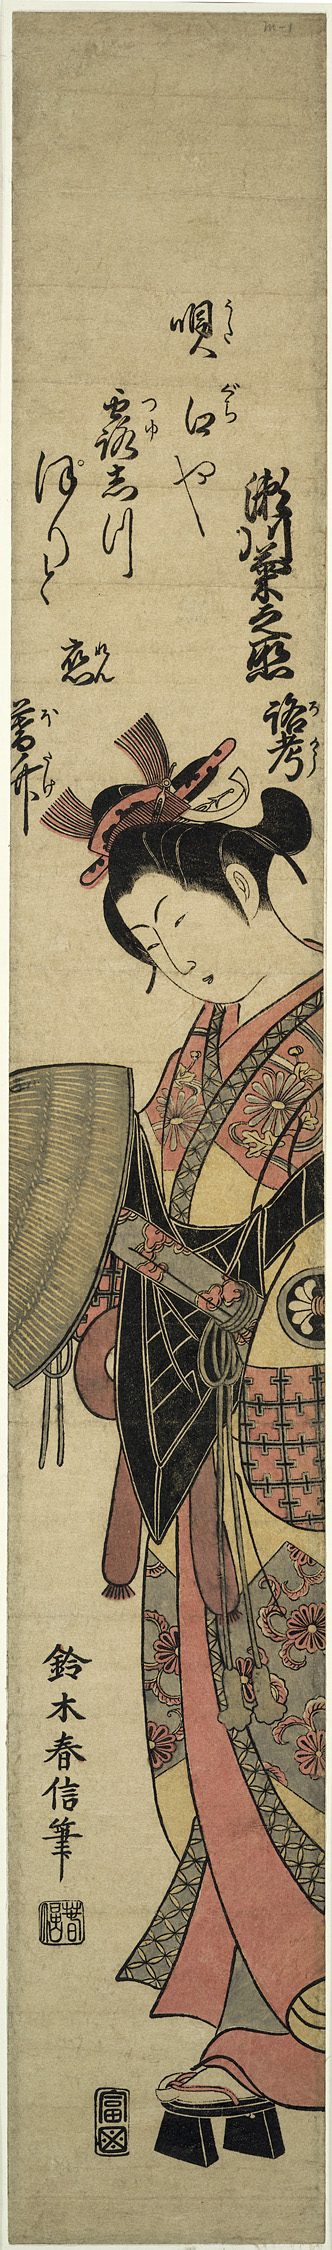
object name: Print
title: The Actor Segawa Kikunojo II as the Nun Seigen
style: Japanese (culture or style)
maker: Suzuki Harunobu 鈴木 春信; Japanese, 1725 (?)-1770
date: c. 1763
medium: Color woodblock print; hashira-e, benizuri-e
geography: Japan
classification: woodblock print; print; asian art